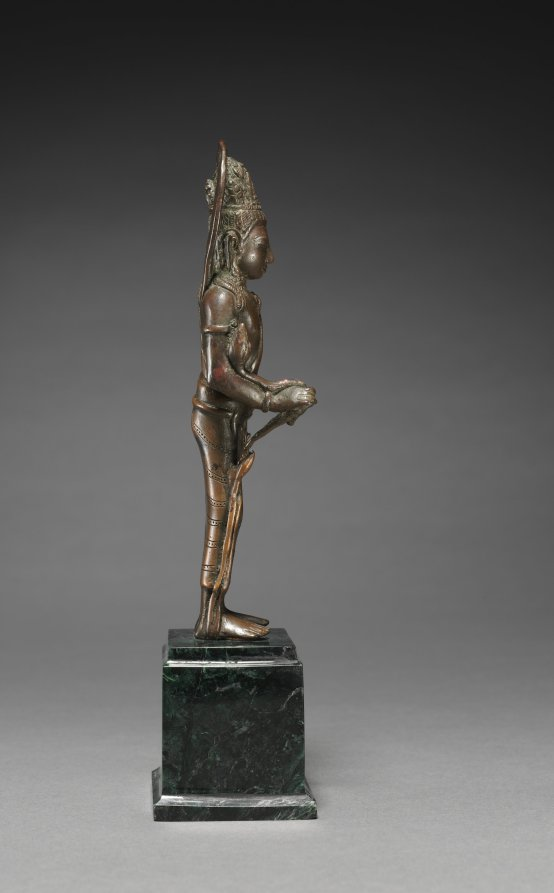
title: Padmapani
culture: Java, Pagan, Sailendra Period, 8th-9th Century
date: 700s-800s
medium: copper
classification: Sculpture